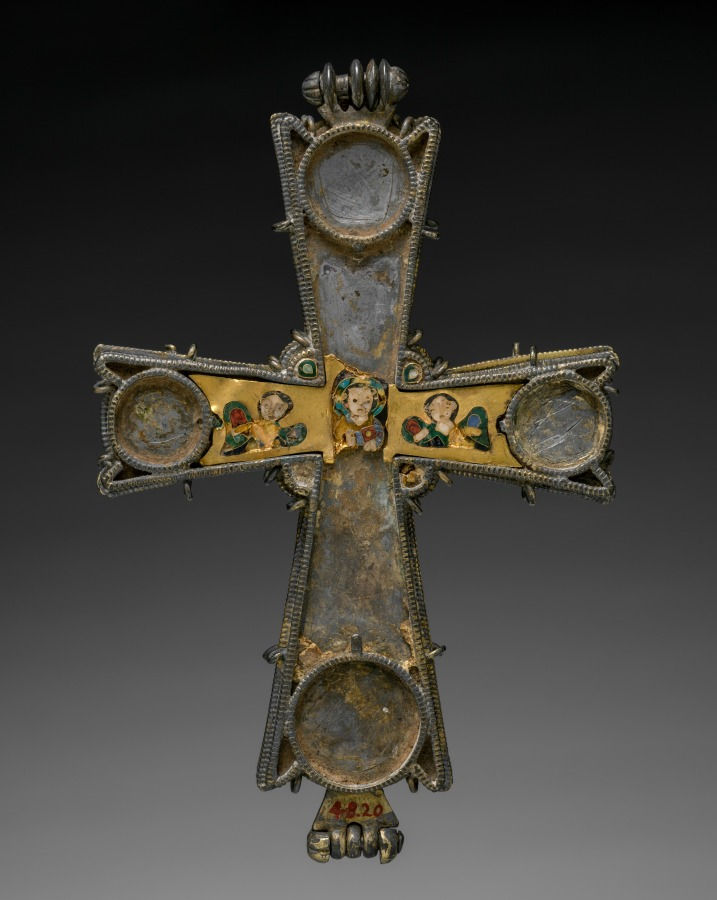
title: Pectoral Cross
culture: Byzantium, Constantinople, Byzantine period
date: 900s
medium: gold, gilt-silver, and cloisonné enamel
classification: Enamel